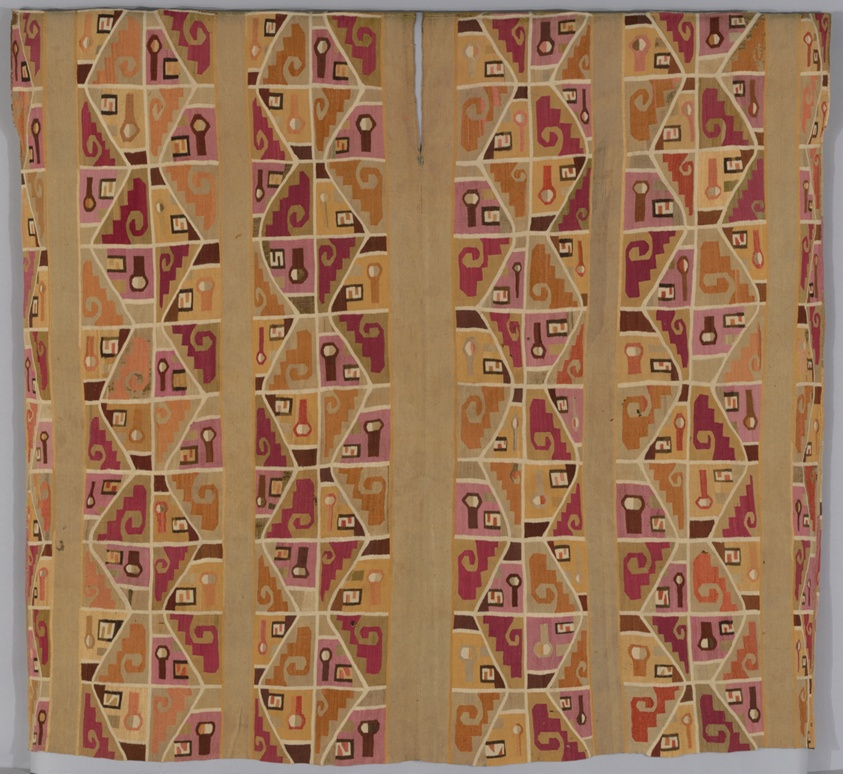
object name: Costume and Accessories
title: Tunic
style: huari, early intermediate period, Pre-Columbian, americas, peruvian, andes, andean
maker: Wari (Probably central or south coast, Peru)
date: 600-800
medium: Cotton and wool (camelid), single interlocking tapestry weave; neck and armholes finished with wool (camelid) in overcast stitches; seams joined with wool (camelid) in darning stitches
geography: Peru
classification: textile; weaving; costume; costume - weaving; tunic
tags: abstract figures, patterns, geometric, spiral, zigzags, hats, faces